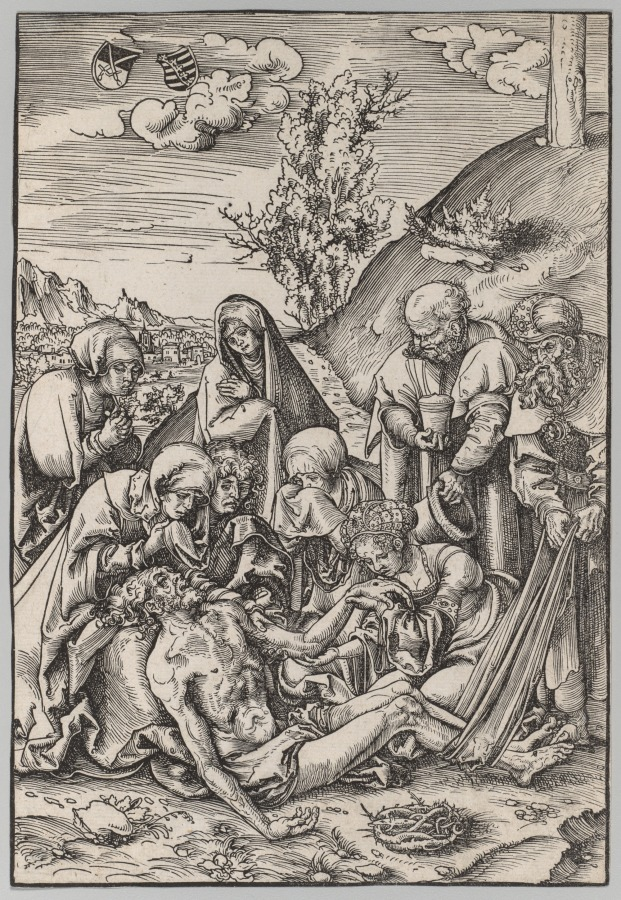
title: The Passion: The Lamentation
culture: Germany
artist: Lucas Cranach (German, 1472–1553)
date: 1509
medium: woodcut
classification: Print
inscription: verso in graphite: 251 center right, 2 upper left corner